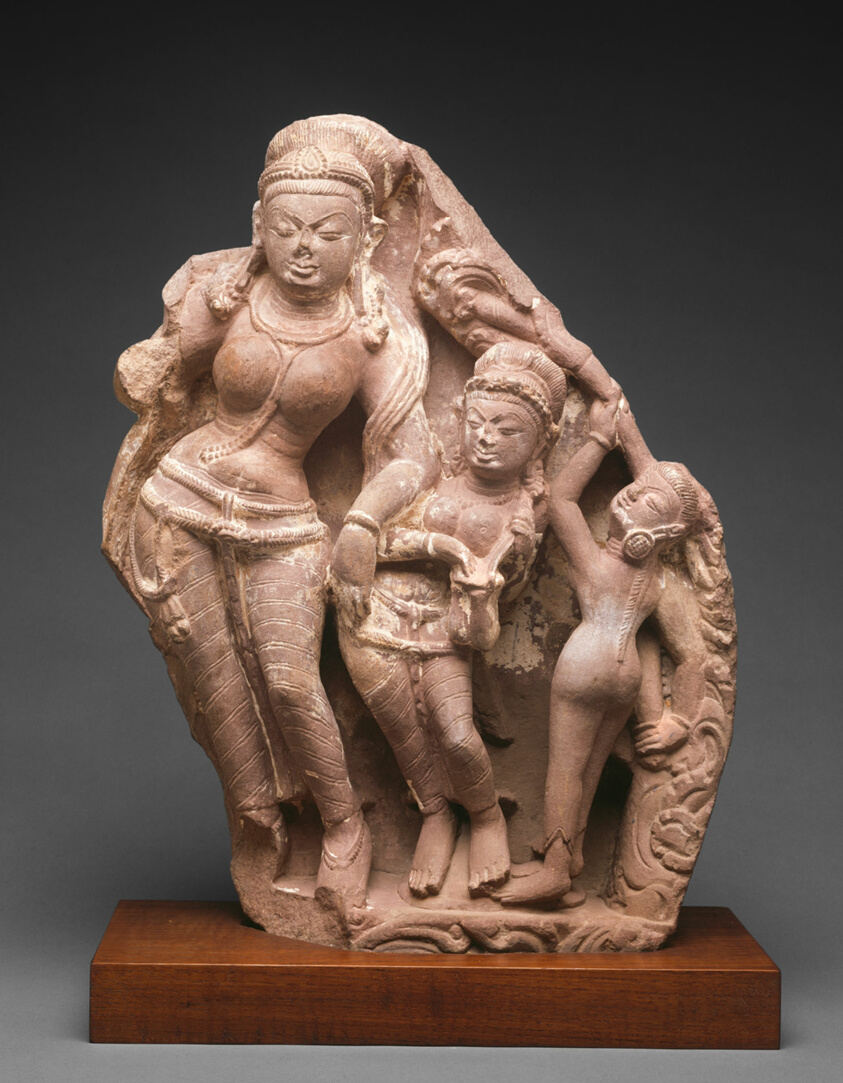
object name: Sculpture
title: River Goddess Ganga with Attendants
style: South Asian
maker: India; Rajasthan or Madhya Pradesh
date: 9th century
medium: Sandstone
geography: India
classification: sandstone; stone; sculpture; asian art